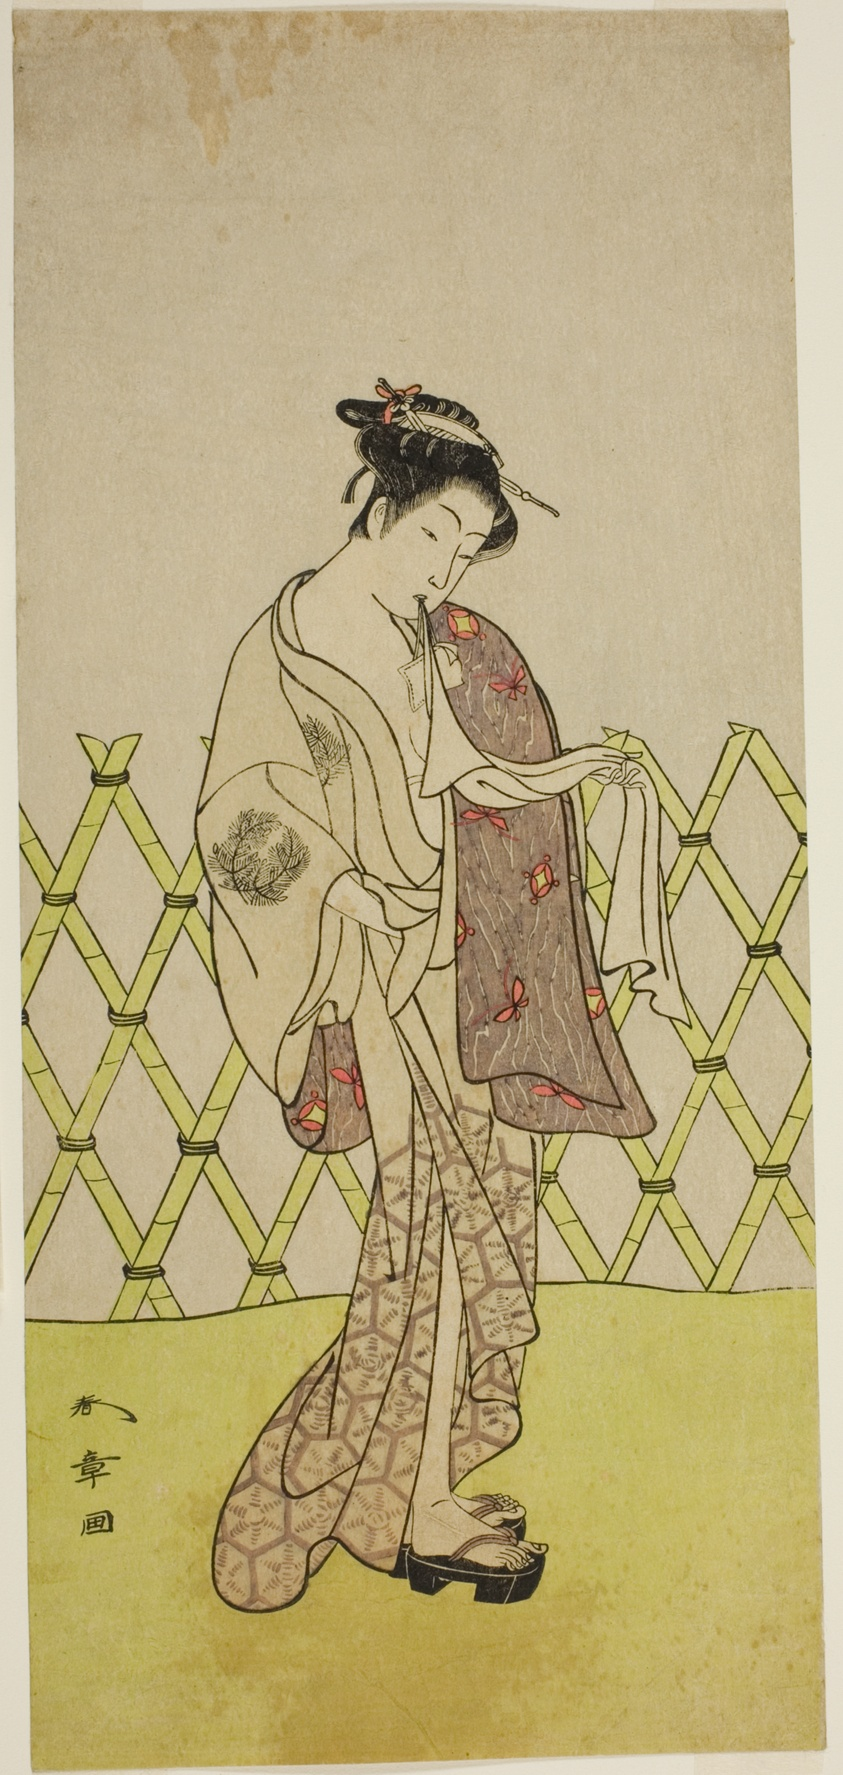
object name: Print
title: The Actor Nakamura Riko I as Hakata no Kojoro (?) in the Play Shitenno-ji Nobori Kuyo, Performed at the Ichimura Theater in the Eighth Month, 1773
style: Japanese (culture or style)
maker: Katsukawa Shunsho 勝川 春章; Japanese, 1726-1792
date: c. 1773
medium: Color woodblock print; hosoban; left sheet of diptych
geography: Japan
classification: woodblock print; print; asian art